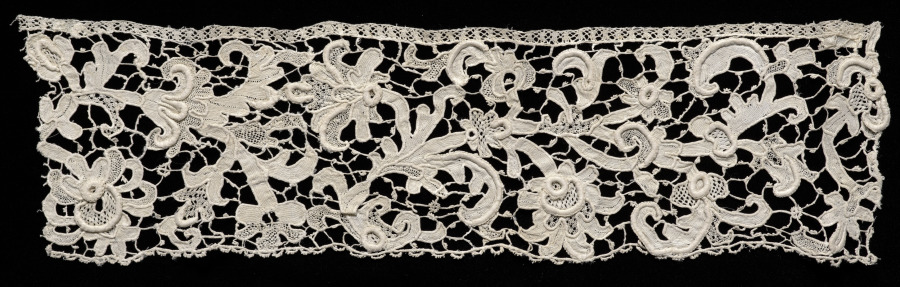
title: Lace Edging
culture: Italy, Venice, 1600s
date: 1600s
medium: Linen: needle lace (Venetian Raised Point)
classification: Lace